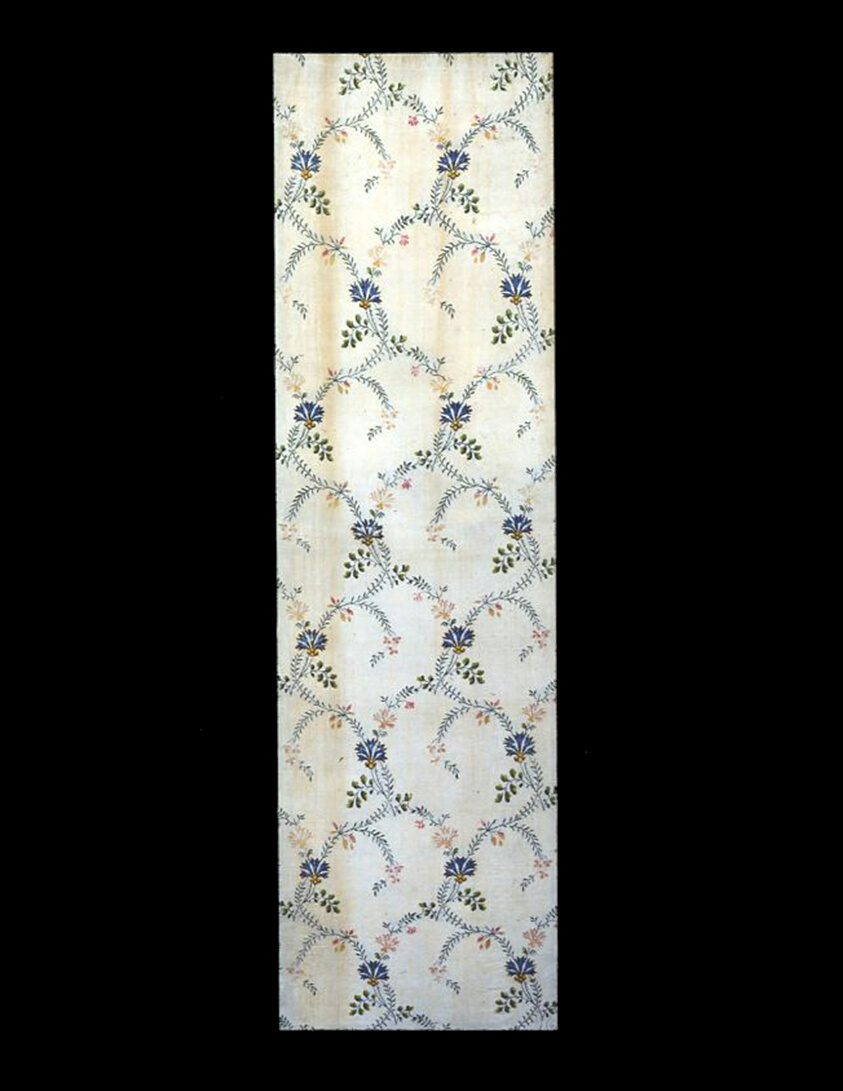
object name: Textile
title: Panel (Style of Toile Normande)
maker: France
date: 1750/1800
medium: Cotton, plain weave; brocaded in wool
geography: France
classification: textile; weaving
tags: fashion